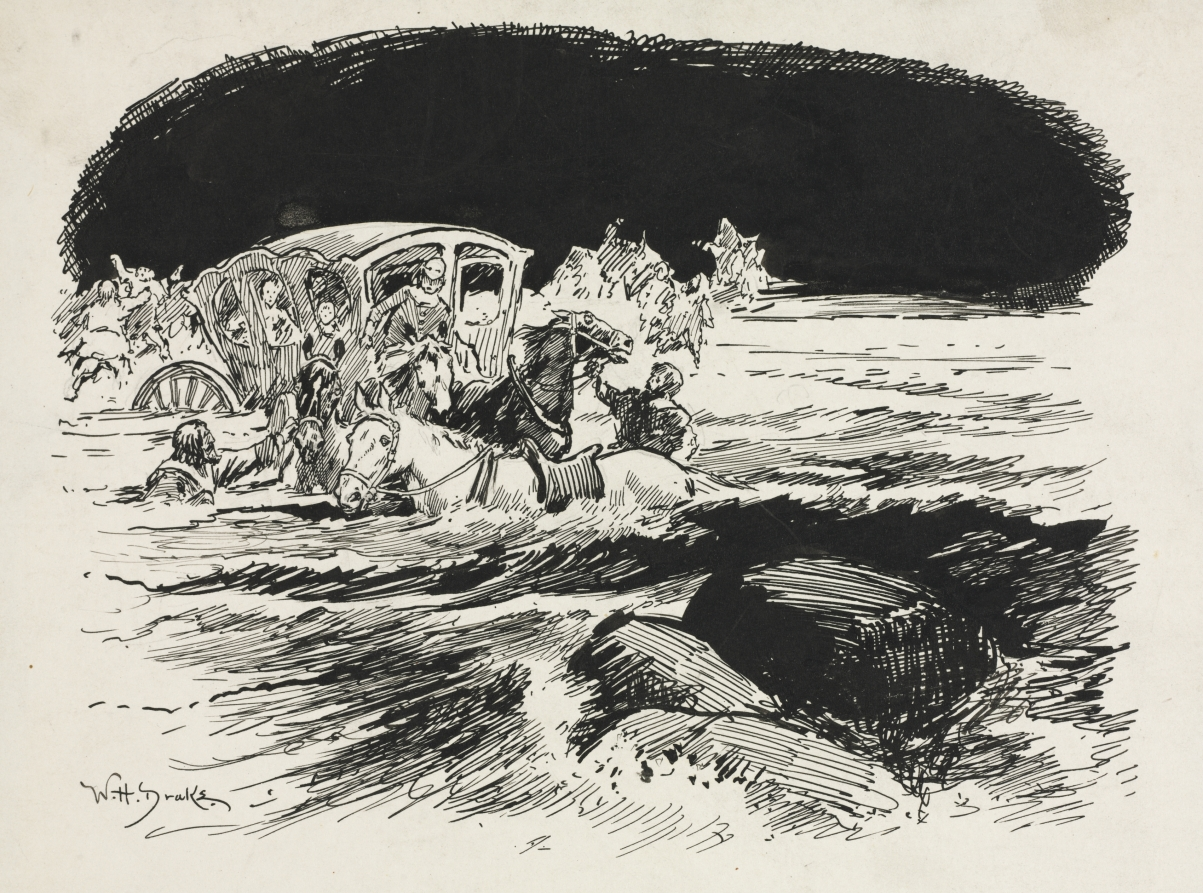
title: Tail Piece for Chapter LIII from "Lorna Doone"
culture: America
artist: William Henry Drake (American, 1856–1926)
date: c. 1889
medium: pen and ink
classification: Drawing